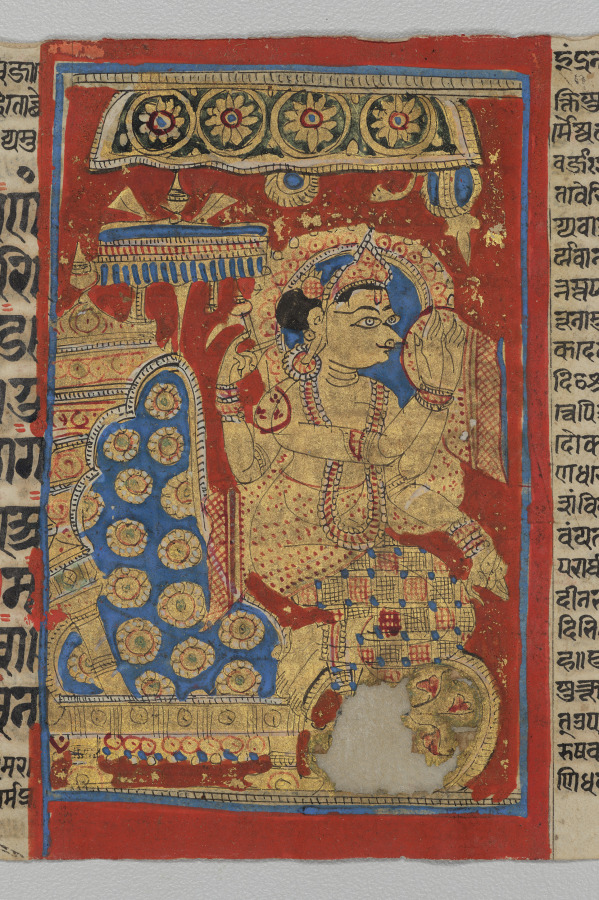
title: Indra Venerates the Embryo of Mahavira, Folio 7 (recto), from a Kalpa-sutra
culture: Western India, Gujarat, last quarter of the 15th century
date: c. 1475–1500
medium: Gum tempera, ink, and gold on paper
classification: Painting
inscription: [[upper right]] indra namuthhuṇaṃ bhaṇai